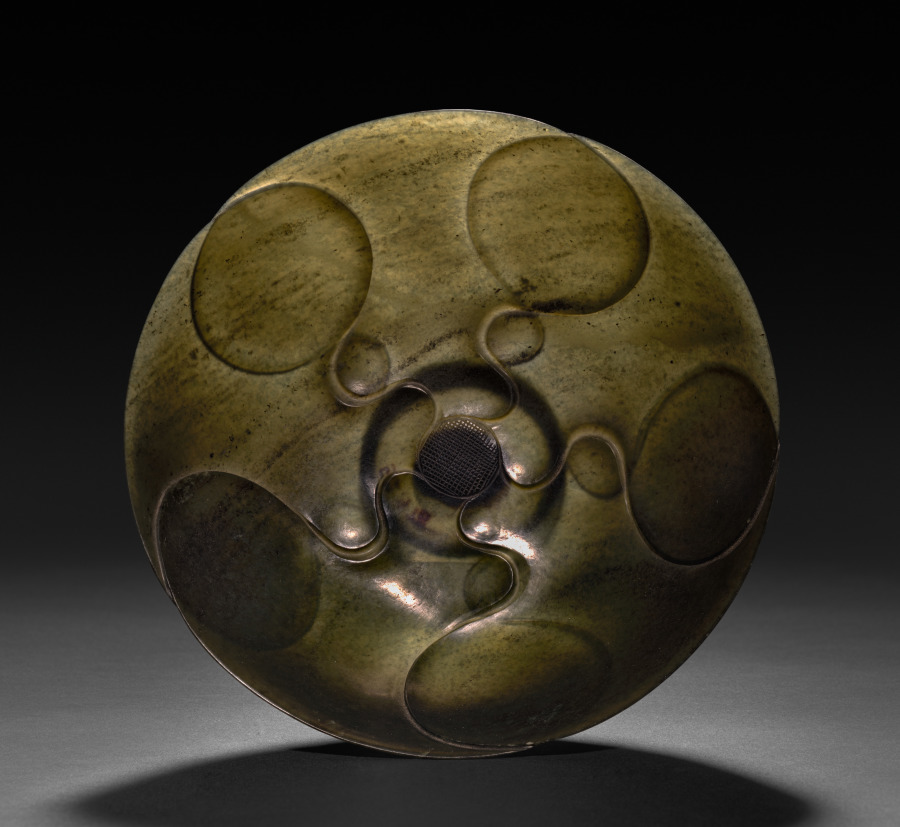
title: Lotus Bowl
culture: China, Qing dynasty (1644-1911)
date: 1700s or later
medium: jade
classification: Jade